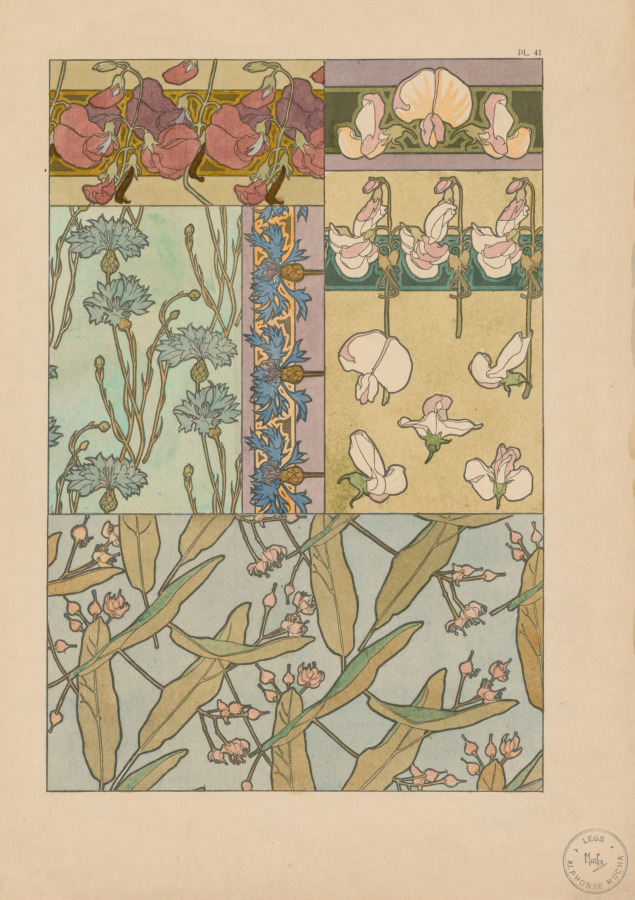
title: Documents Decoratifs: Sweet Peas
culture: Czechoslovakia, late 19th-early 20th century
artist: Alphonse Mucha (Czech, 1860–1939)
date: 1901–2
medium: lithograph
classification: Print